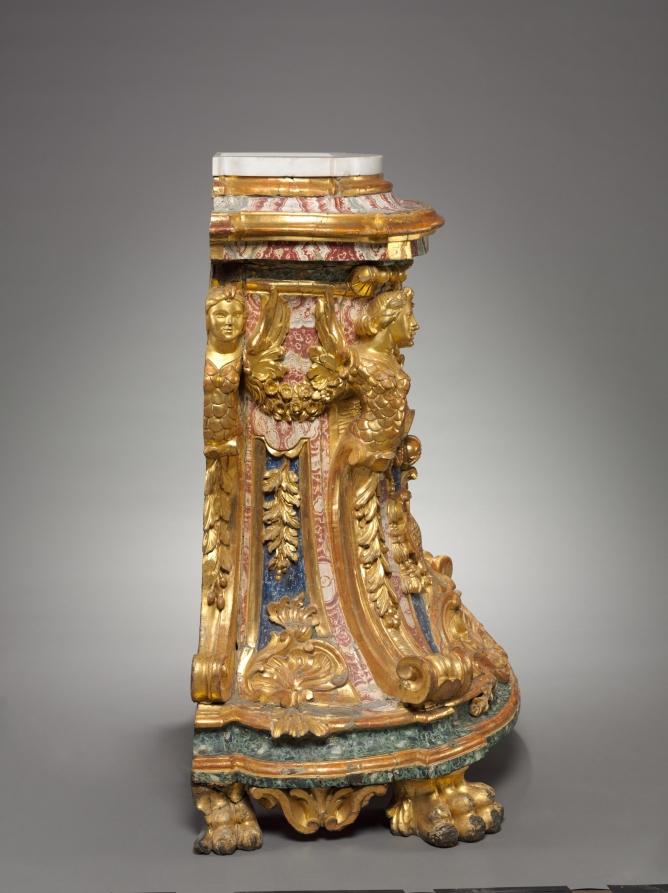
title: Pedestal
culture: Italy, Rome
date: mid-1700s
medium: carved, gilded, and painted wood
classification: Furniture and woodwork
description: The coat of arms on this pedestal is that of Cardinal York, the last of the Stuart pretenders to the British throne. He lived out his years in Rome, where he had been made a cardinal of the Church.